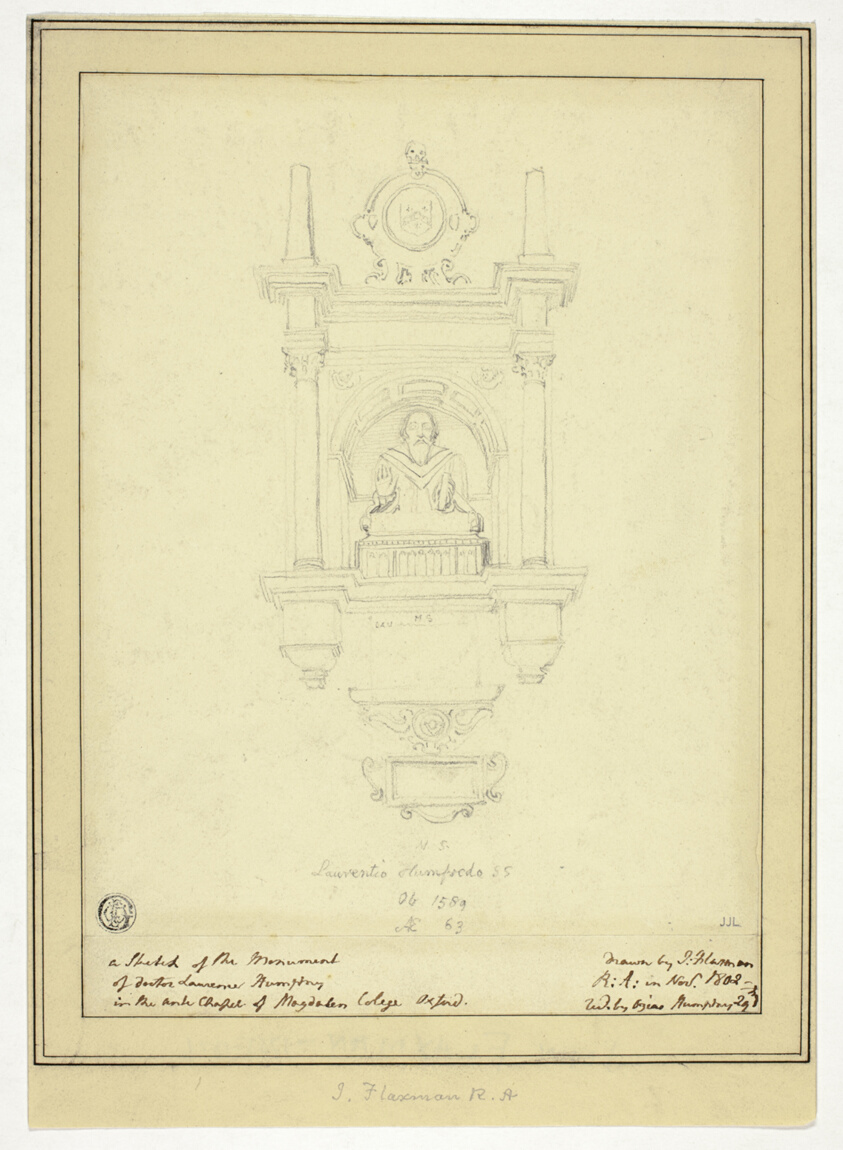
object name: Drawing and Watercolor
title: The Monument of Doctor Lawrence Humphrey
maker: John Flaxman, II; English, 1755-1826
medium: Black chalk on cream wove paper, laid down on cream wove paper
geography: England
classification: chalk; paper; drawings (visual works); prints and drawing